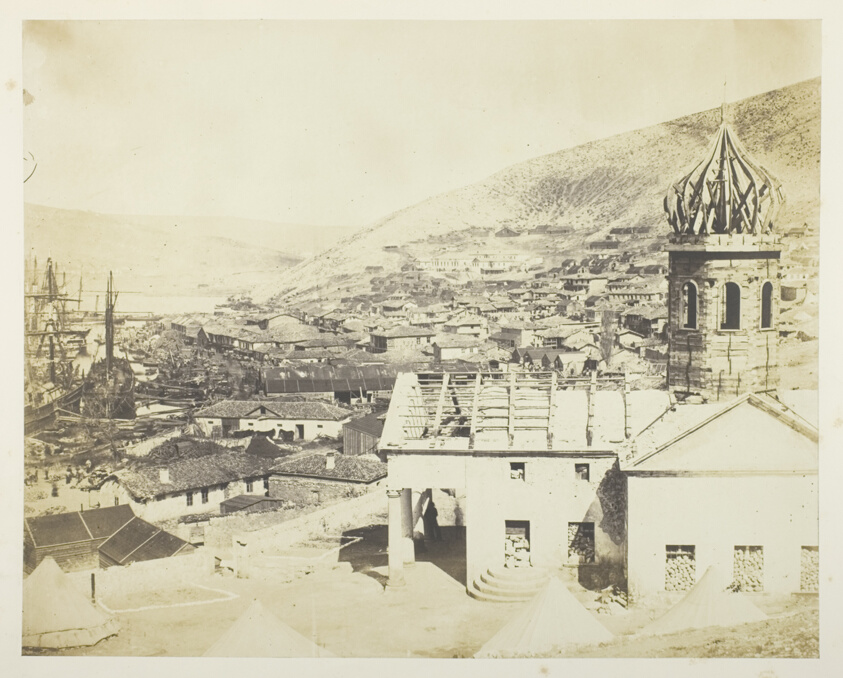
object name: Photograph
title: The Russian Church & Town of Balaklava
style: 19th century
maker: Roger Fenton (English, 1819–1869)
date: 1855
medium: Salted paper print, plate 24 from the album "Photographs Taken in the Crimea" (1856)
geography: England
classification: salted paper print; photographic process; photography; photograph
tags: Collected by Hugh Edwards, Crimea 1856